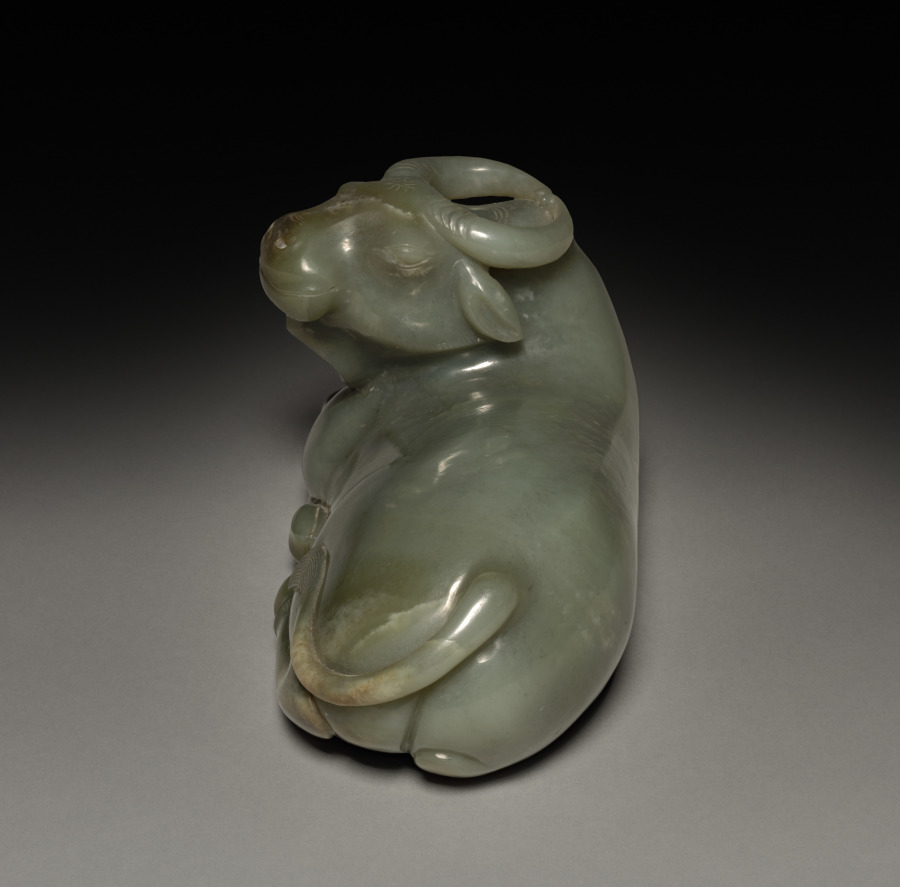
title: Reclining Water Buffalo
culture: China, Qing dynasty (1644-1911)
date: 1644–1911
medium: jade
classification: Jade